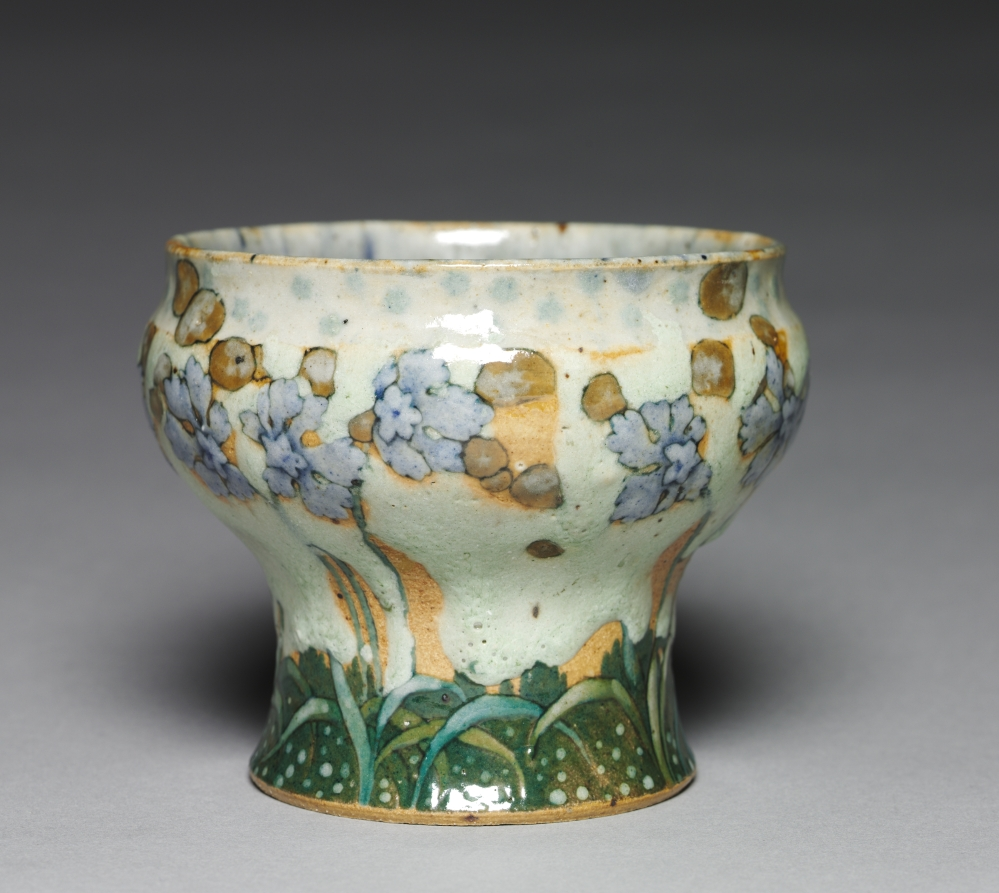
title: Bowl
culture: France, 19th century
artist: Albert Louis Dammouse (French)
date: c. 1900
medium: stoneware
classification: Ceramic